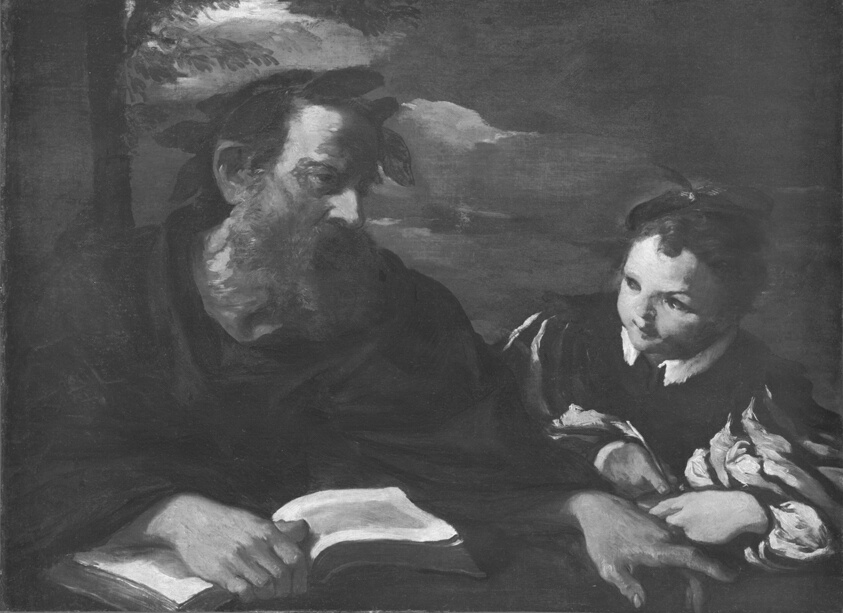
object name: Painting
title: Homer Dictating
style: 17th Century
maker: Pier Francesco Mola (Italian, 1612–1666)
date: 1660/65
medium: Oil on canvas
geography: Italy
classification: painting; Italian; paint; oil paintings (visual works); oil on canvas; european painting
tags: man, reading, philosophers, historical figures, children, boys, book, bearded man